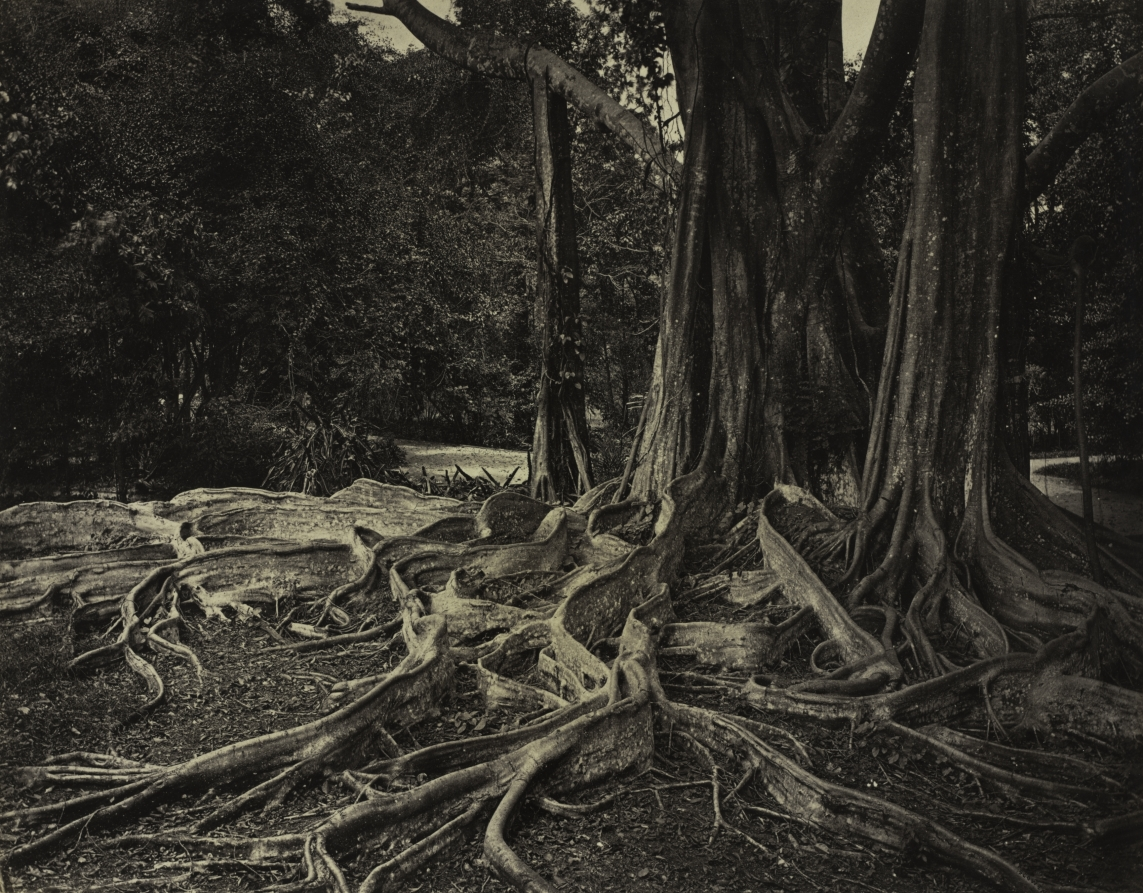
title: Rubber Tree, Assam, India (Ficus Elastica)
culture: England, 19th century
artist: Charles T. Scowen (British)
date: c.1880s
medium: albumen print from wet collodion negative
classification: Photograph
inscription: Titled in negative: "FICUS ELASTICA--ASSAM--INDIA--RUBBER. SCOWEN / & / CO"; written in pencil on recto: "Rubber Tree"